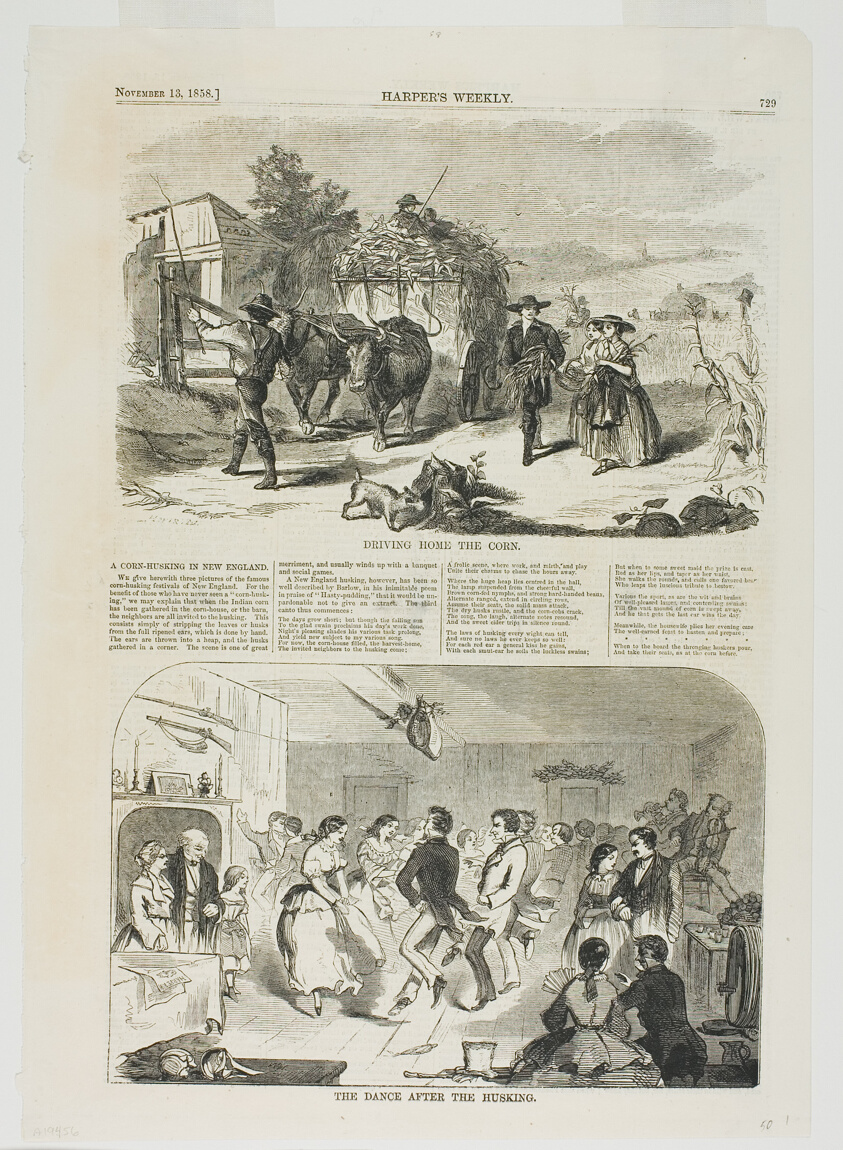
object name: Print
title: Driving Home the Corn and The Dance After the Husking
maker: Winslow Homer (American, 1836-1910); published by Harper's Weekly (American, 1857-1916)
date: published November 13, 1858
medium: Wood engravings on paper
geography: United States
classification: wood engraving; print; prints and drawing